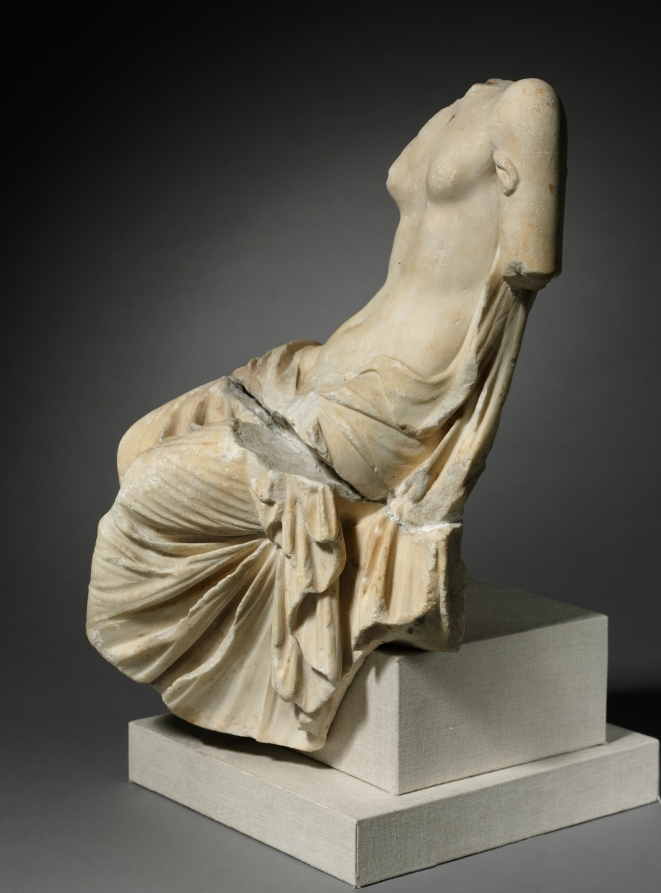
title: Seated Figure of a Woman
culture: Italy, Roman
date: 1–200 CE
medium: marble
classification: Sculpture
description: Although the original subject of this ancient Roman statue fragment is unknown, the cut stone at the back of its base indicates that the statue rested on a ledge, probably incorporated into a larger sculptural group. The nude upper body and relaxed pose suggest an alluring mythical woman, like Venus or a nymph, a beautiful female spirit that embodies elements of nature such as water, woods, or mountains.